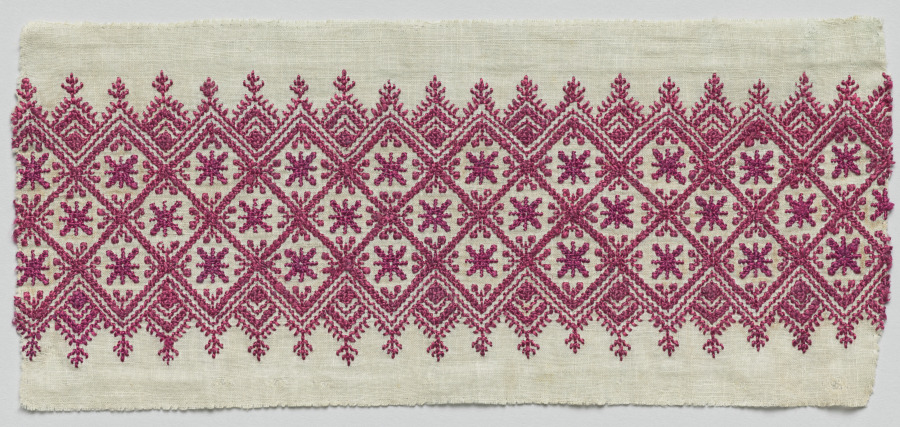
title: Fragment of a furnishing textile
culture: Africa, North Africa, Morocco, Fes, Moroccan embroiderer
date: 1700s–1800s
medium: Cotton, silk, dye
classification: Embroidery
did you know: Myrta Leonora Jones, the donor of this work, was a women’s rights activist in Cleveland in the early 20th century.